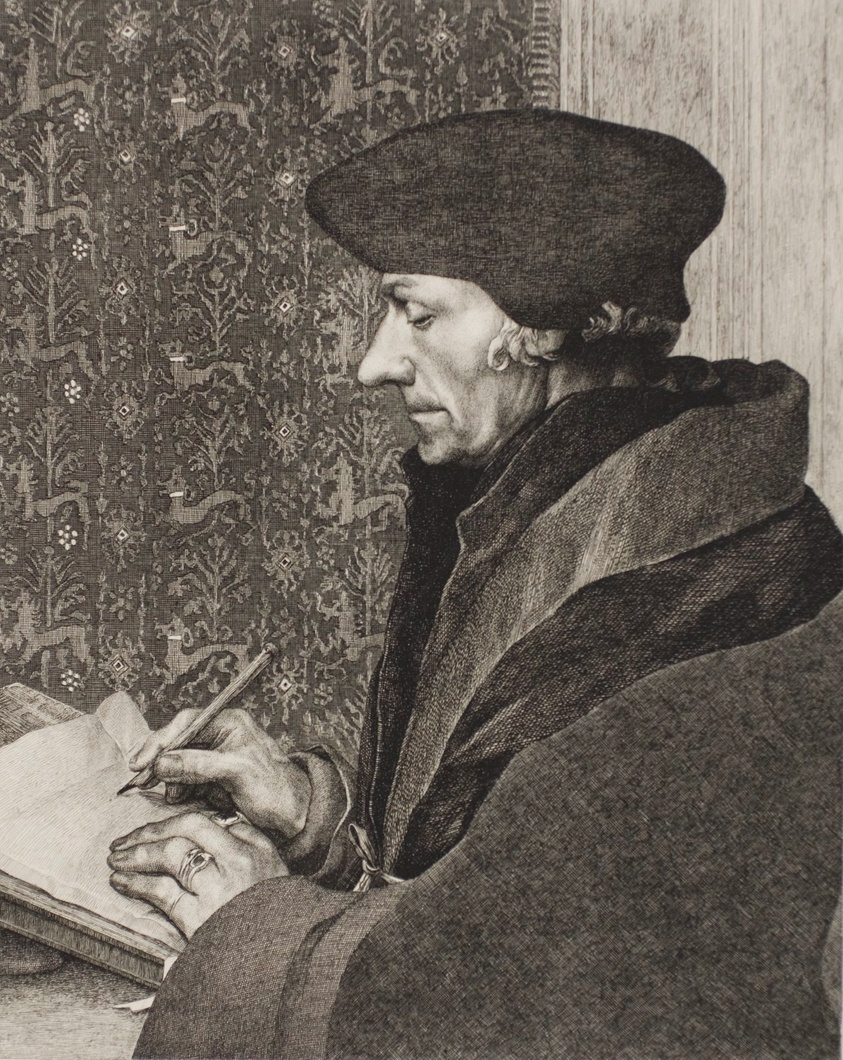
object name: Print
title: Erasmus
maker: Félix Bracquemond (French, 1833-1914); after Hans Holbein the younger (German, 1497-1543)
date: 1863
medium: Etching and drypoint on white wove paper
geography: France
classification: etching; print; prints and drawing